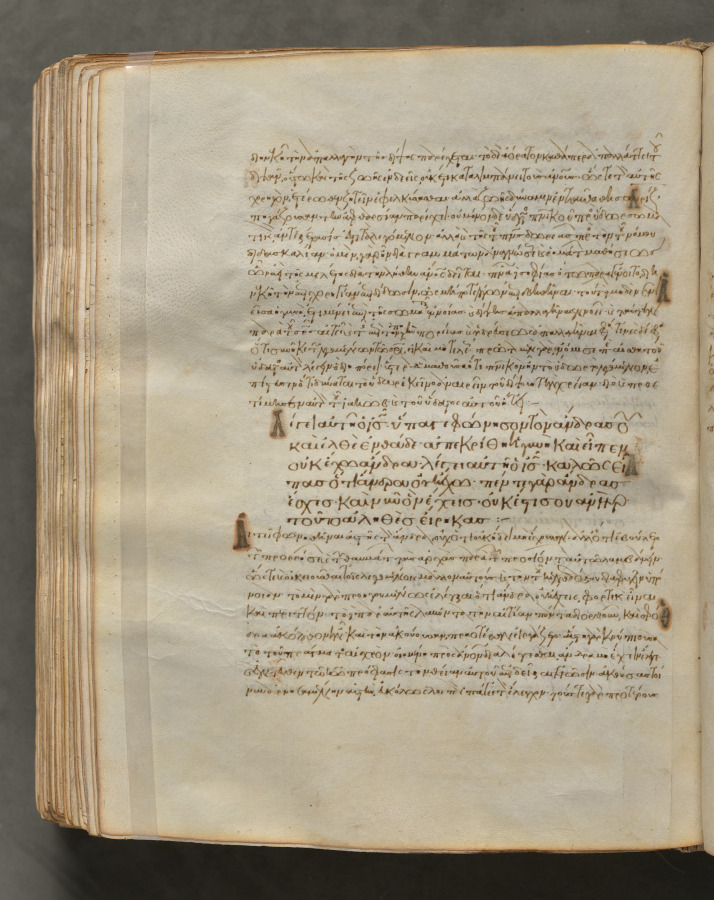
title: Text, folio 338 (verso), from a Gospel Book with Commentaries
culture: Byzantium, Constantinople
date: c. 1000–1100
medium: ink, tempera, and gold on vellum; leather binding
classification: Bound Volume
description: Each of the four gospels in this book opens on a page with brilliantly illuminated borders depicting the author of the text as well as birds—principally peacocks, symbols of the immortality of the soul—and fountains, representing the fountain of life and the salvation of the soul. This volume consists of 428 leaves with texts in Greek. Its level of sophistication suggests that it was probably written and decorated in a monastery in Constantinople.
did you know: Gospel books were carried in procession through Byzantine churches.